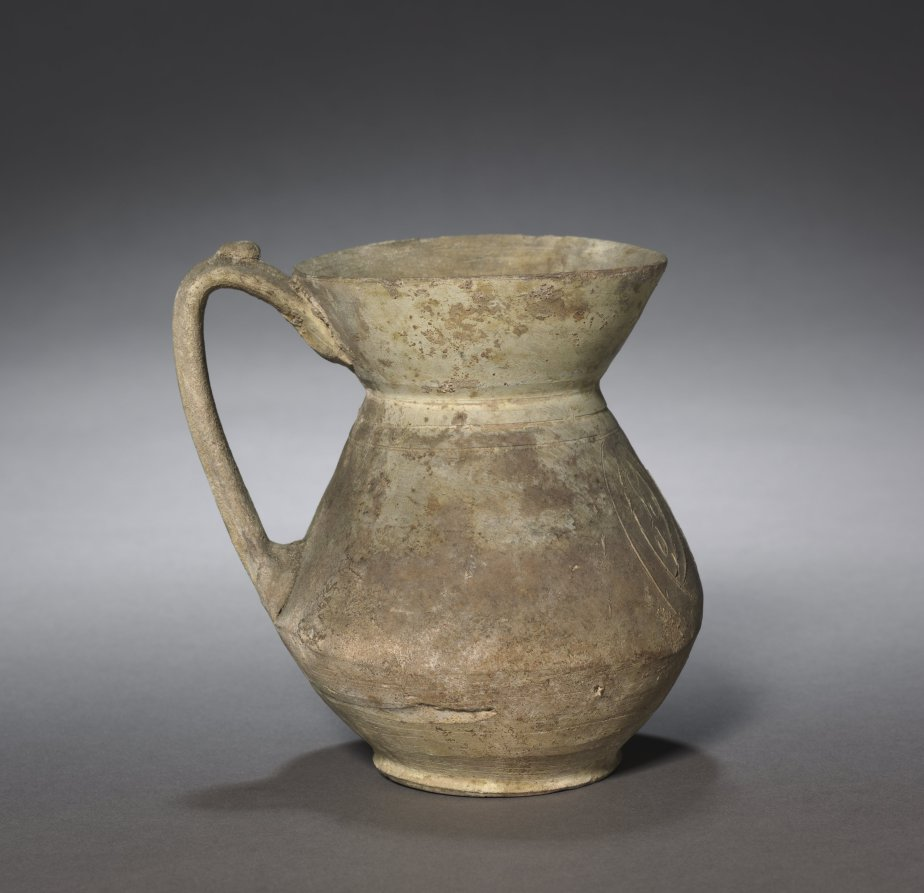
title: Jug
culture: Iran, Samanid period, 900s–1100s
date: 900s–1100s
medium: earthenware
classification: Ceramic